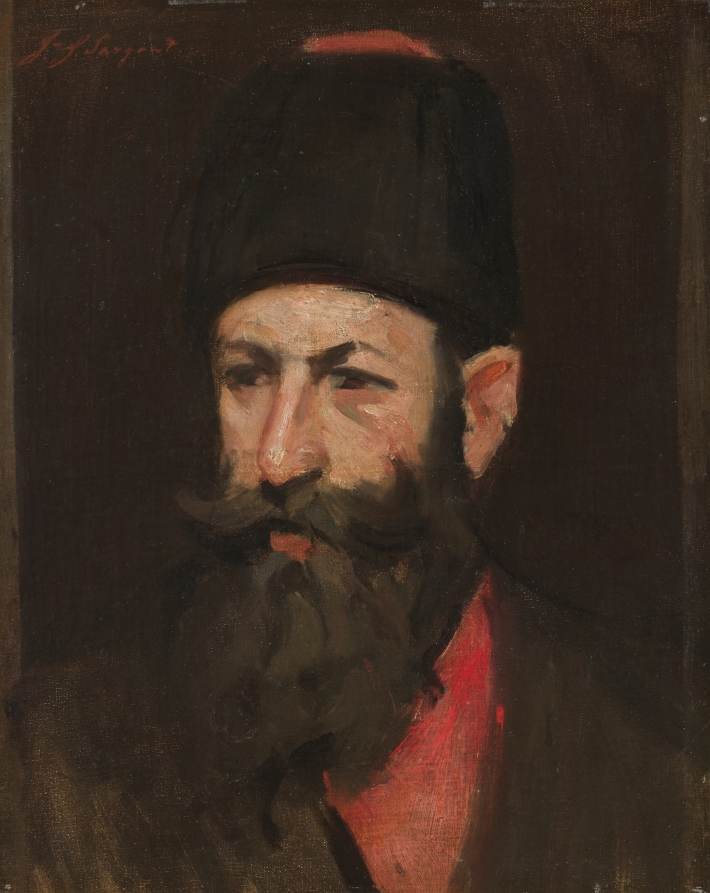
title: The Cossack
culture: America, late 19th-early 20th Century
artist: imitator of John Singer Sargent (American, born Italy, 1856–1925)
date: undated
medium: oil on canvas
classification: Painting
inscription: signed upper left: J. S. Sargent